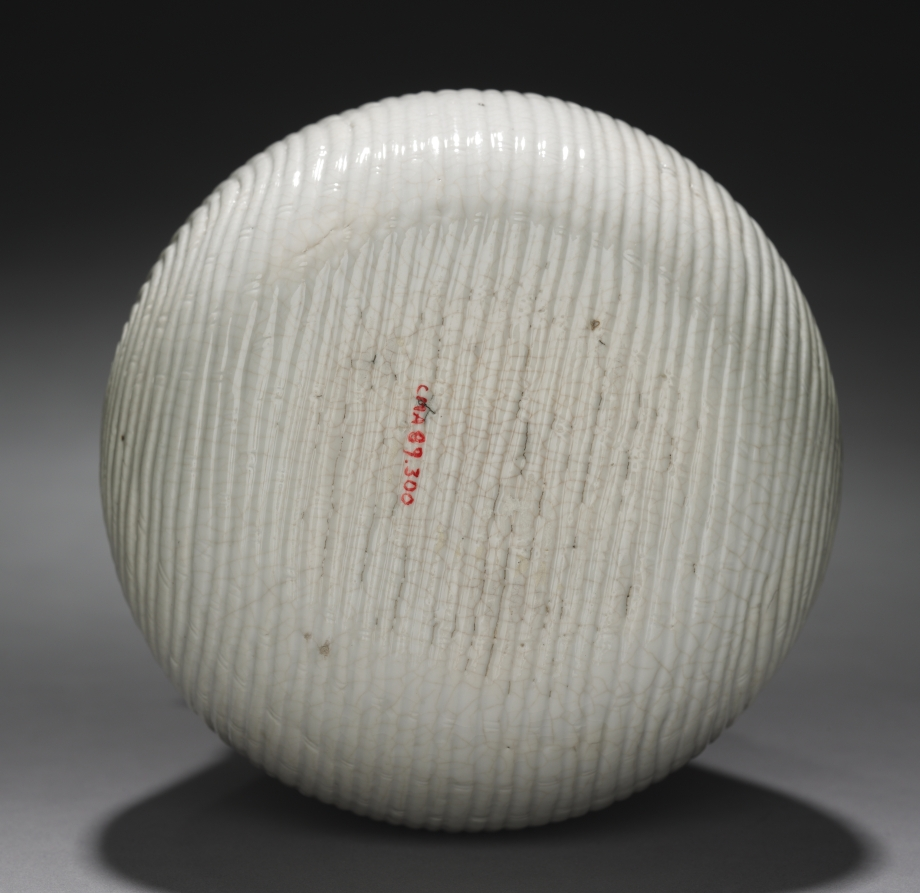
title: Basket Shaped Vase: Ding Ware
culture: China, Ming dynasty (1368–1644)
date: 1600s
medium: glazed porcelain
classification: Ceramic